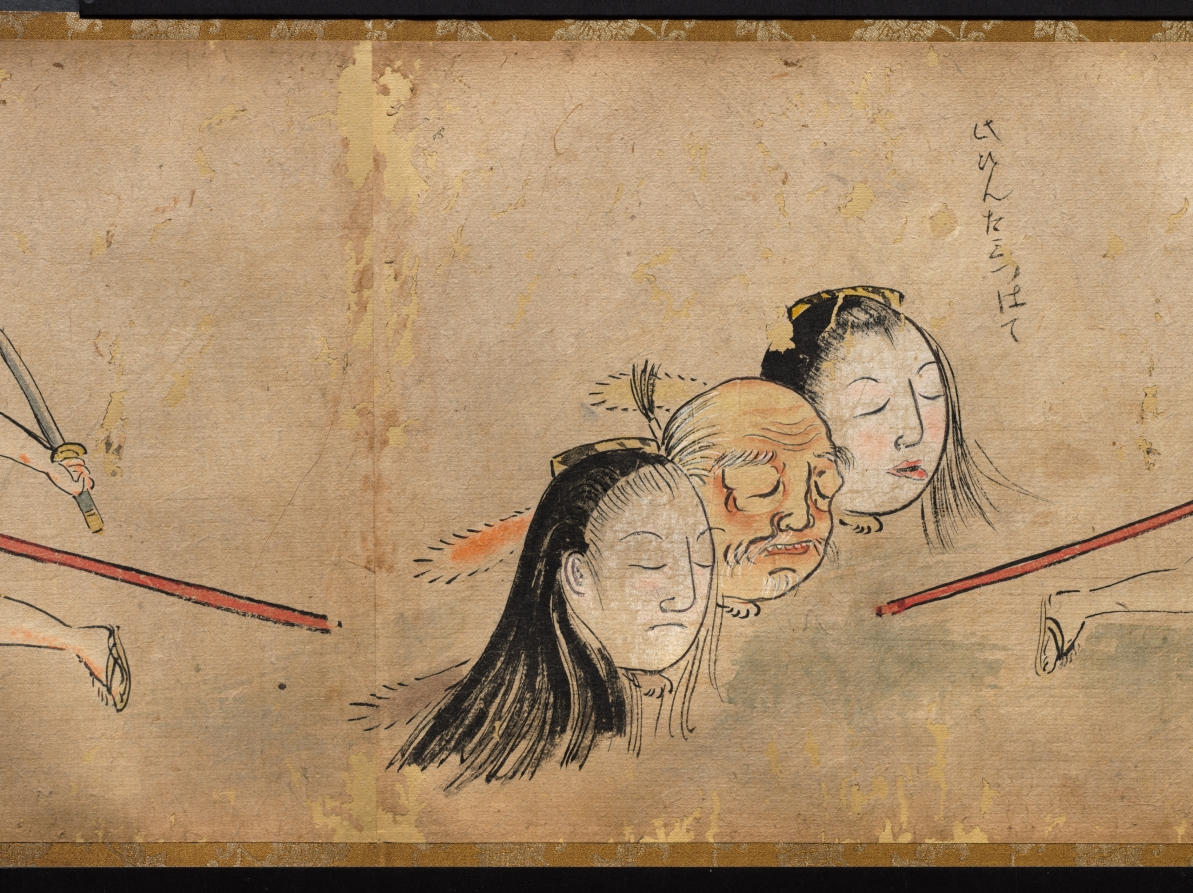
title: The Illustrated Tale of Oishi Hyōroku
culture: Japan, Edo period (1615–1868)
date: 1700s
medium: handscroll; ink and color on paper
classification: Painting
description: This incomplete handscroll illustrates part of the story of Oishi Hyoroku, a young man tasked with battling fox apparitions who were creating problems in his town. In other extant versions of the scroll, the story is set in the fall of 1624 in Kagoshima in southern Japan. Throughout the story, Hyoroku is tricked and terrified by the foxes that shift their shapes into a variety of monstrous phantoms. After repeated humiliations, he eventually captures two of the foxes. In this version, colloquial texts that function like text blurbs in comics appear throughout the scroll, but the main text is missing.